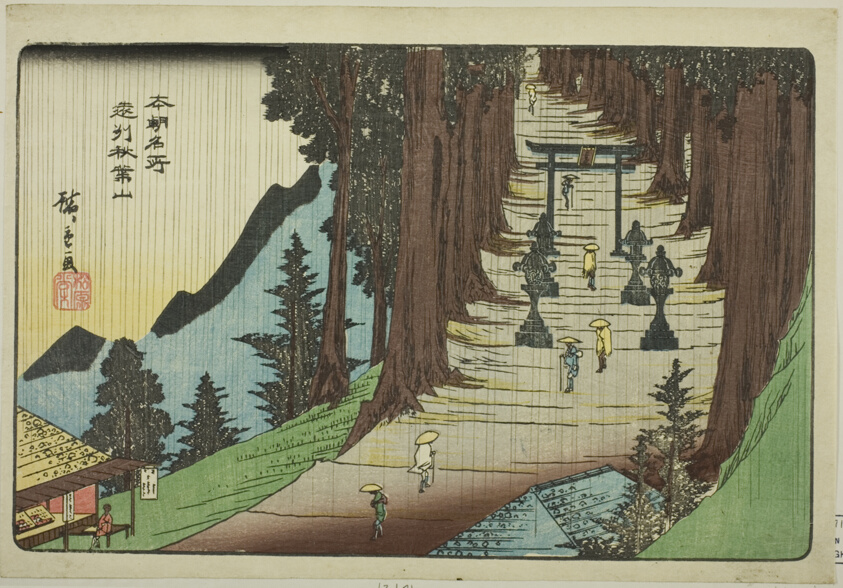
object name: Print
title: Mount Akiba in Totomi Province (Enshu Akibayama) from the series "Famous Places of Japan (Honcho meisho)"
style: Japanese (culture or style)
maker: Utagawa Hiroshige 歌川 広重; Japanese, 1797-1858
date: c. 1837/39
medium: Color woodblock print; oban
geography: Japan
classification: woodblock print; print; asian art